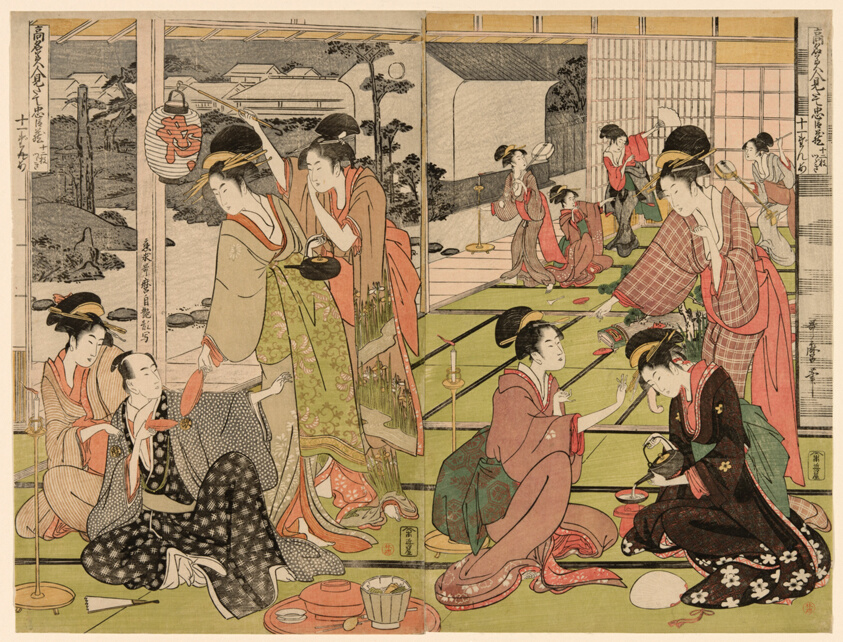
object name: Print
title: Act Eleven from the series "The Chushingura Drama Parodied by Famous Beauties (Komei bijin mitate Chushingura Junimai Kuzuki)"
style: Japanese (culture or style)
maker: Kitagawa Utamaro 喜多川 歌麿; Japanese, 1753 (?)-1806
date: c. 1794/95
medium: Color woodblock prints; oban diptych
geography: Japan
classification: woodblock print; print; asian art